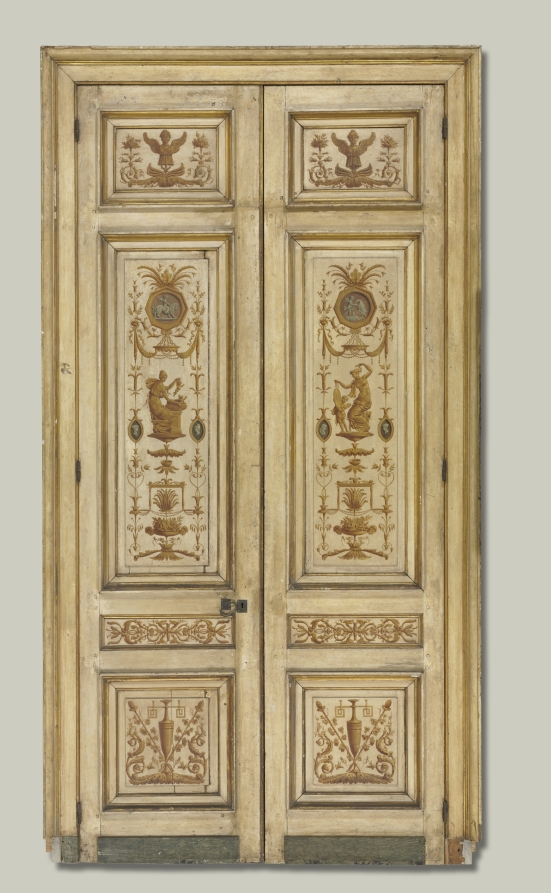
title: Double-Leaf Door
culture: France, 18th century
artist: Pierre Rousseau (French, 1751–1829)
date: 1790s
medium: oil on wood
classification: Painting